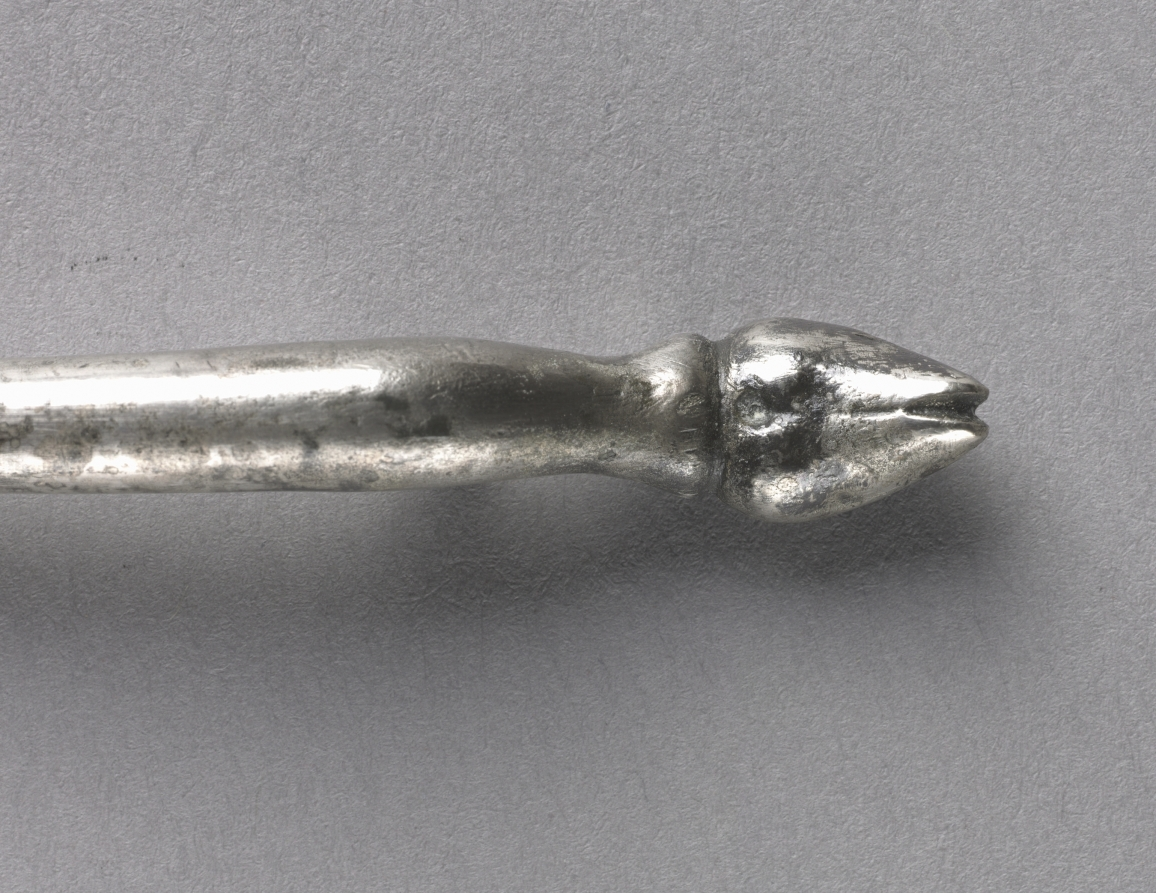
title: Fork with Animal Hoof Finial (Ornament)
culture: Byzantium, Syria(?), Byzantine period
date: 300s CE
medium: silver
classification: Metalwork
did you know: In the 10th century, forks like this one were common in Byzantium. During this same period in Western Europe, people usually ate with their fingers, thinking that forks were decadent.